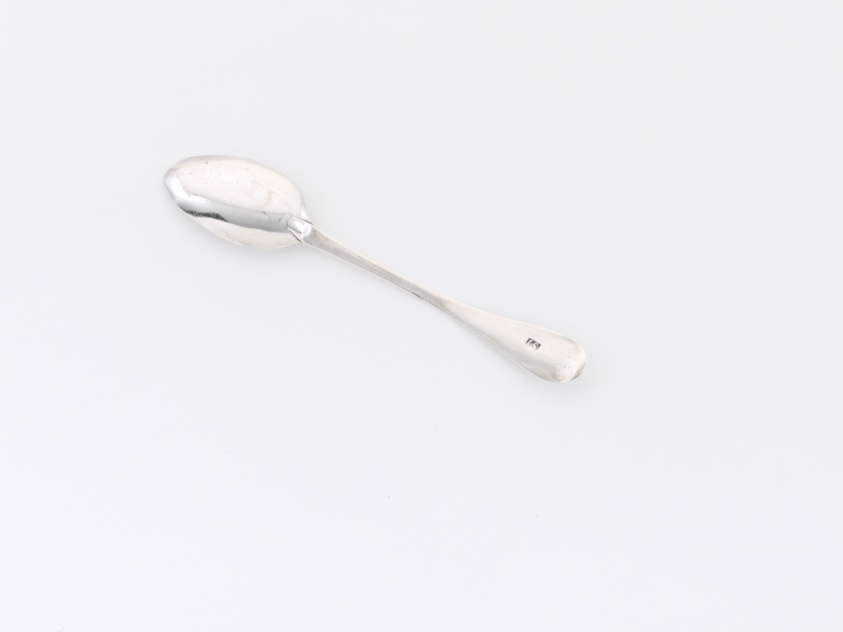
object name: Metalwork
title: Pair of Coffee Spoons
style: 18th Century, 19th century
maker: Artist unknown (American, 18th–19th century)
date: 1790–1812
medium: Silver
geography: United States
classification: spoon; silver; utensil; american decorative arts; american arts; decorative arts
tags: spoon, eating, dining